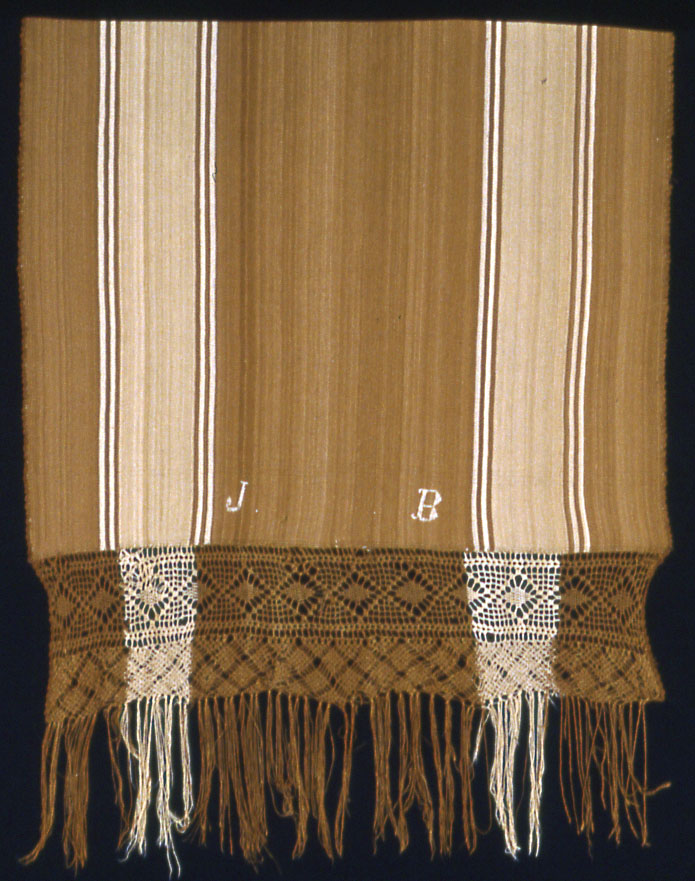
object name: Religious/Ritual Object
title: Ceremonial Scarf (bufando or ufanta)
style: aymará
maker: Aymara (Bolivia)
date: 1850/1900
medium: Wool and cotton, warp-faced plain weave embroidered with cross stitches; attached crochet edging and borders terminating in knotted cut fringe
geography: Bolivia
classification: textile; weaving; ritual objects